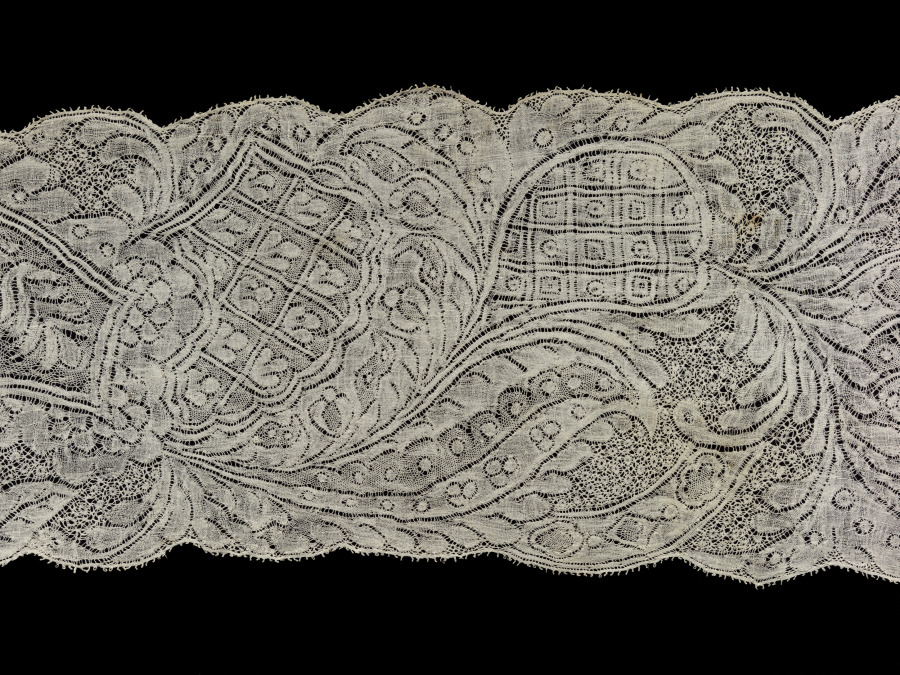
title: Lace Lappet (one of a pair)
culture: Belgium, Binche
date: 1700s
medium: Linen: bobbin lace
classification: Lace